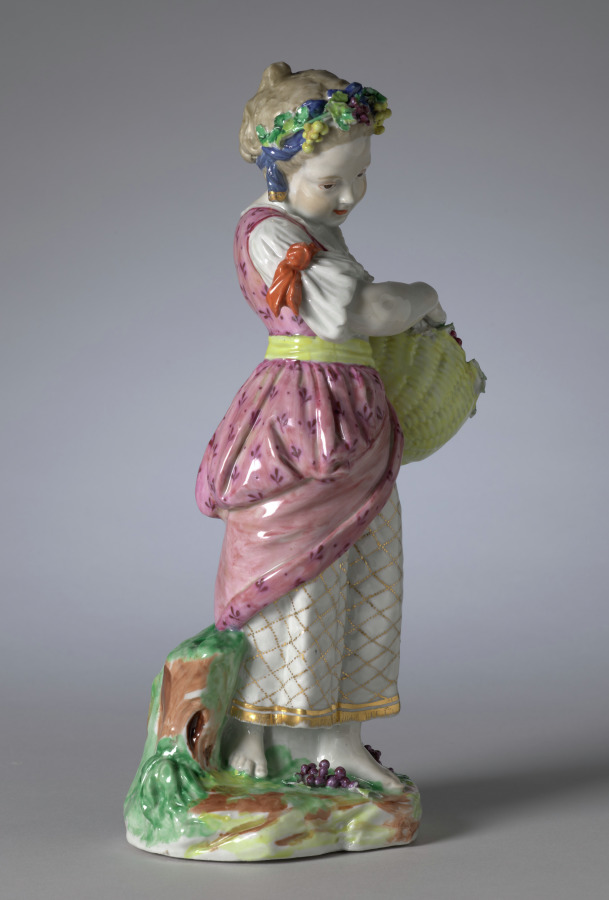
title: Figure of Autumn from the Four Seasons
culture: England, Bristol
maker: Bristol Porcelain Factory (British, 1770–81)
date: c. 1775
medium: hard-paste porcelain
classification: Ceramic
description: The modern notion of childhood as a time of innocence and simplicity emerged during the second half of the eighteenth century. This understanding of adolescence led to numerous depictions of children as personifications of the four seasons. Here autumn is portrayed as a young girl playfully jostling her overskirt as she balances a basket of fruit against her hip. The grapes, plums, and apples filling her basket allude to a plentiful fall harvest.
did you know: Allegorical figures most often decorated a table during the dessert course, providing amusing subjects for conversation.